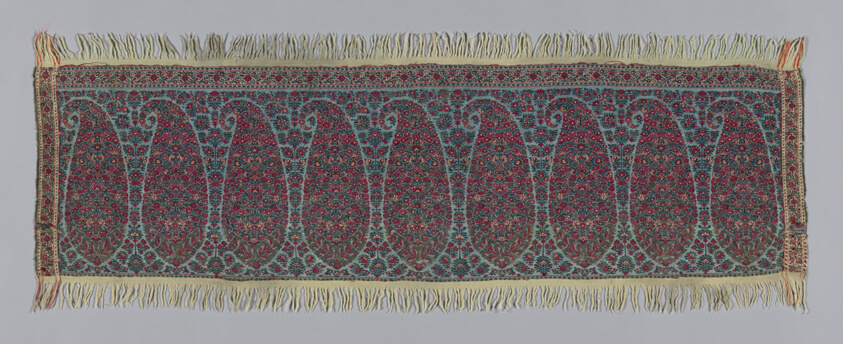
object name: Costume and Accessories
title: Shawl Border Fragment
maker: India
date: 1815/20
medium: Wool, double interlocking 2:2 'S' twill tapestry weave; ends of pieced 2:2 'S' twill weaves; main warp fringe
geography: India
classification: textile; weaving; costume